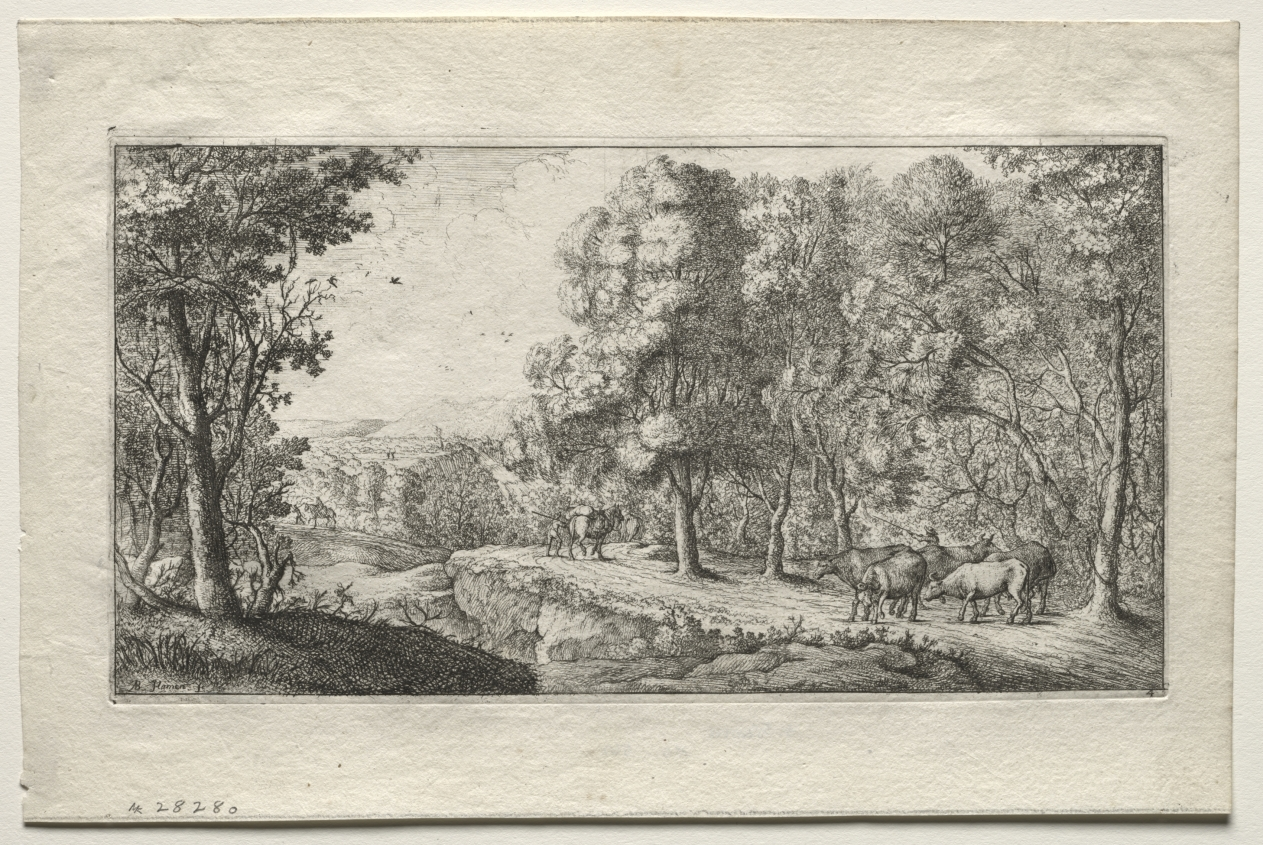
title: The Road at the Border of the Woods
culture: Flanders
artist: Albert Flamen (Flemish, c. 1620–1669)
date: 1635–69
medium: etching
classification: Print